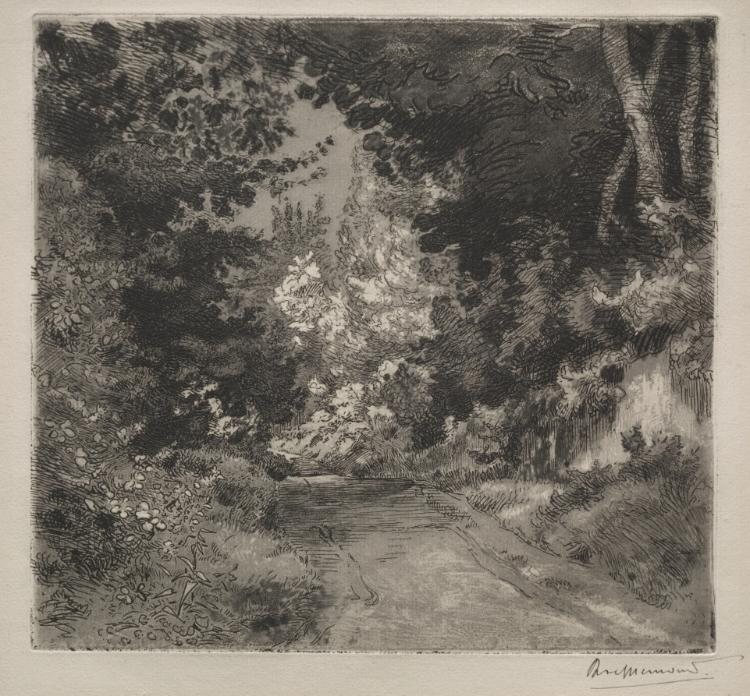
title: Road to Sèvres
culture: France, 19th century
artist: Félix Bracquemond (French, 1833–1914)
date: c. 1872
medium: etching and aquatint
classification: Print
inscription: signed in black ink, lower left: "Bracquemond"; title in graphite on verso